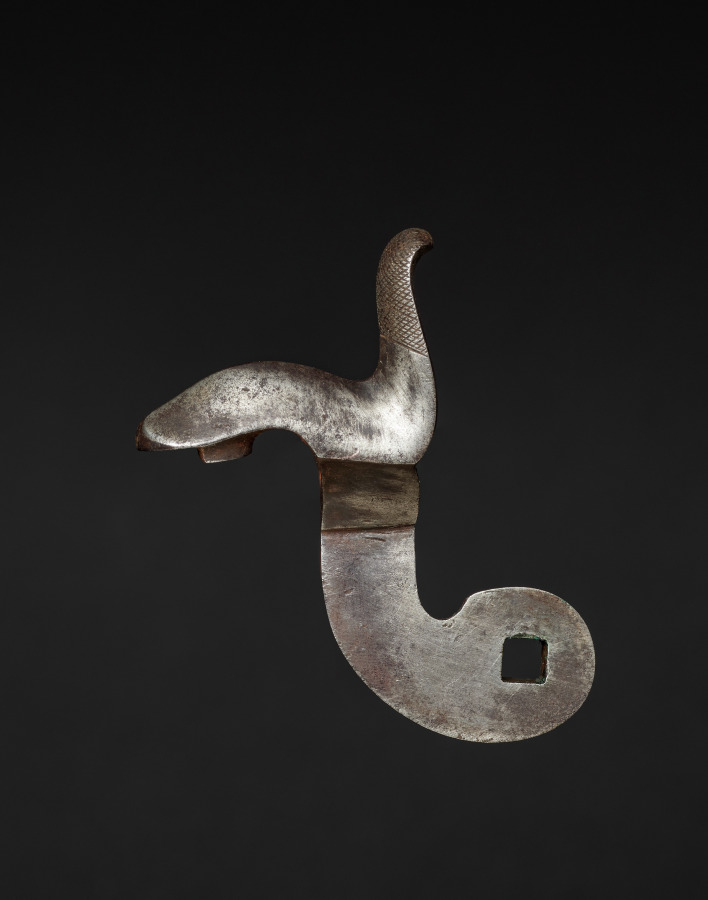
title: Gun-Lock Hammer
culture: England, early 19th century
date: c. 1800–1825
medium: steel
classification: Arms and Armor